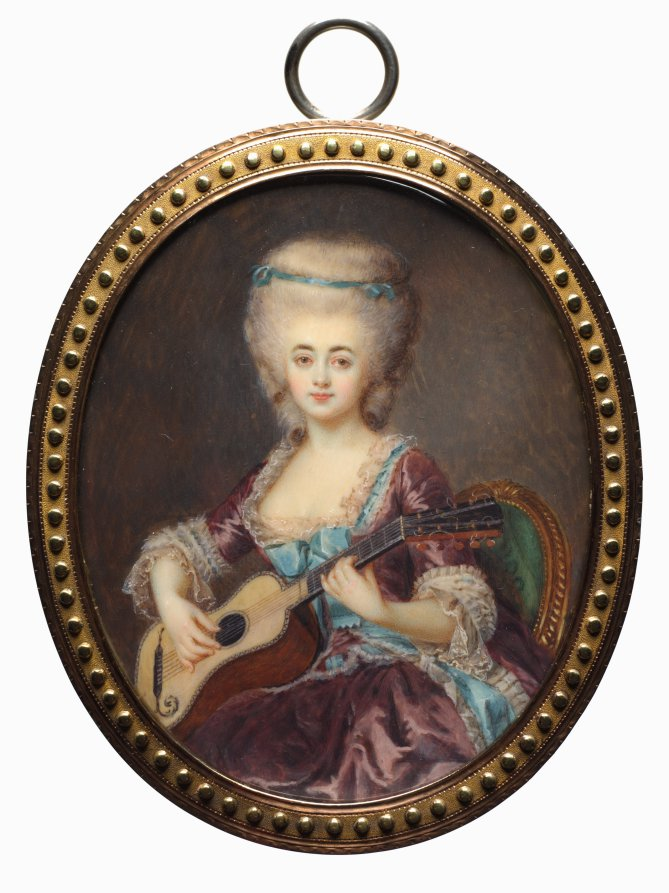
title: Portrait of a Woman with a Guitar, called Louise D'Aumont, Mazarin, Duchesse d'Aumont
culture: France, 18th century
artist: Antoine Vestier (French, 1740–1824)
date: late 18th century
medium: watercolor on ivory in gold mount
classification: Portrait Miniature